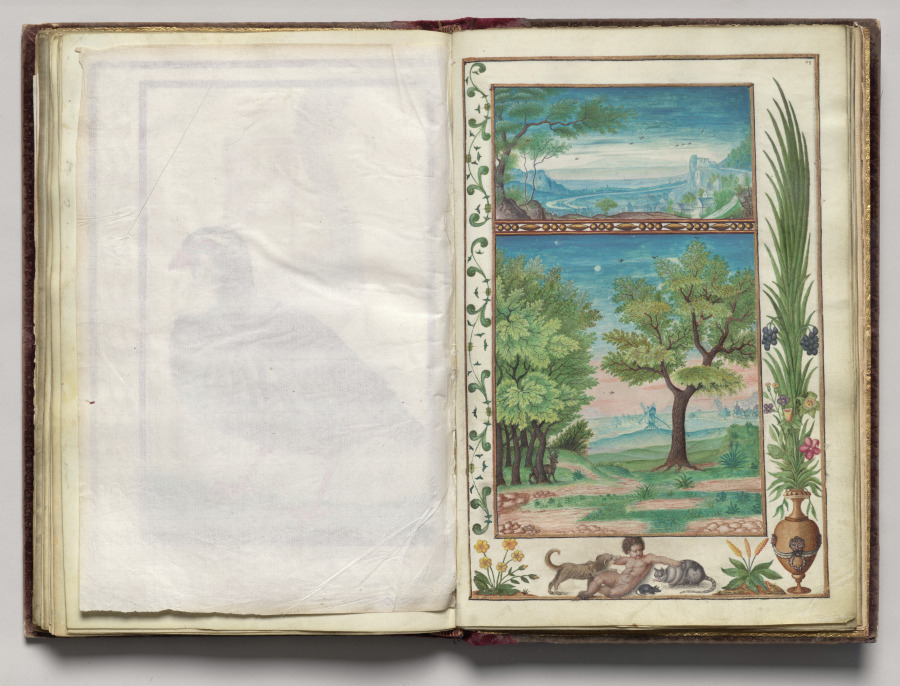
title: Two Landscapes with Dog, Putti, Rat, Cat, and Urn Border, folio 41 (recto), from Florilegium (A Book of Flower Studies)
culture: France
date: 1608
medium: watercolor, ink, silver, and gold over occasional traces of pencil, on vellum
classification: Bound Volume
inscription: Dated: Poitiers 1608 (on frontispiece) Signed: On frontispiece in black ink, lower right: Van Kuyk Notation on drawing: Frontispiece: in pencil, lower margin: * élève de Van Kessel, peintre flammand (* in pencil also appears in front of Van Kuyk's name).